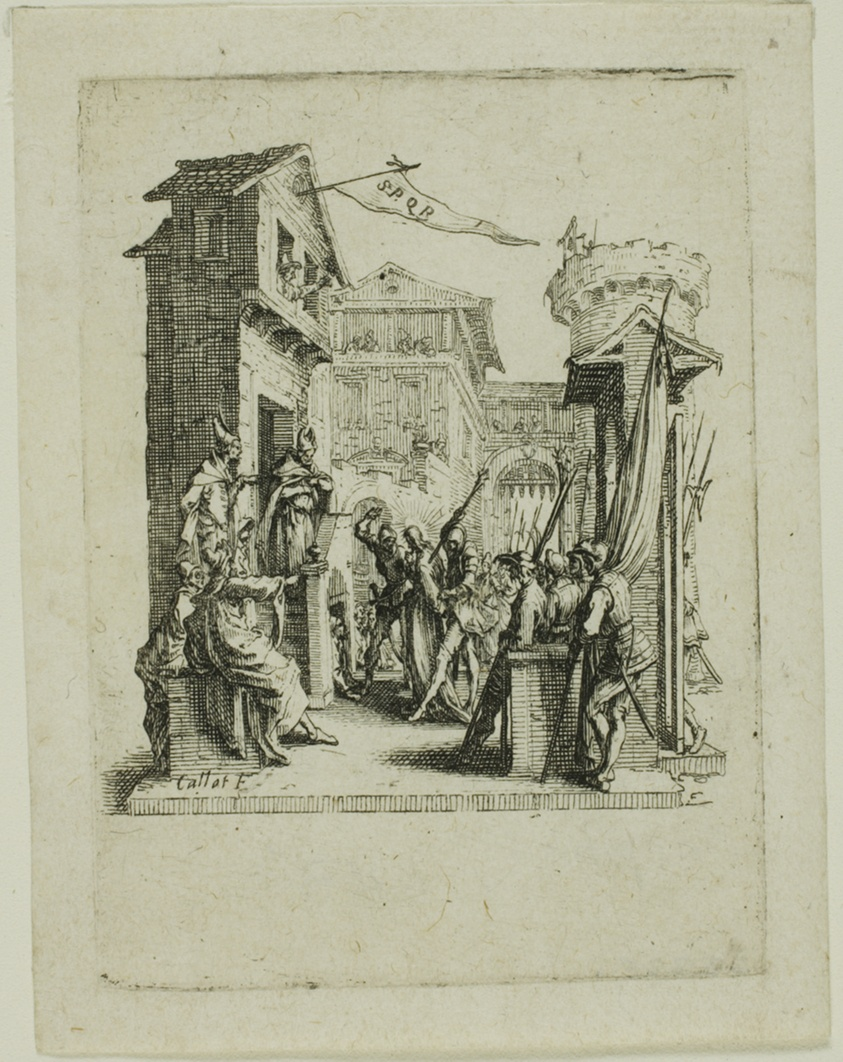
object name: Print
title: Jesus Before Caiaphas, from The Small Passion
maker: Jacques Callot (French, 1592-1635)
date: 1624/31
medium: Etching on ivory laid paper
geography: France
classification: etching; print; prints and drawing